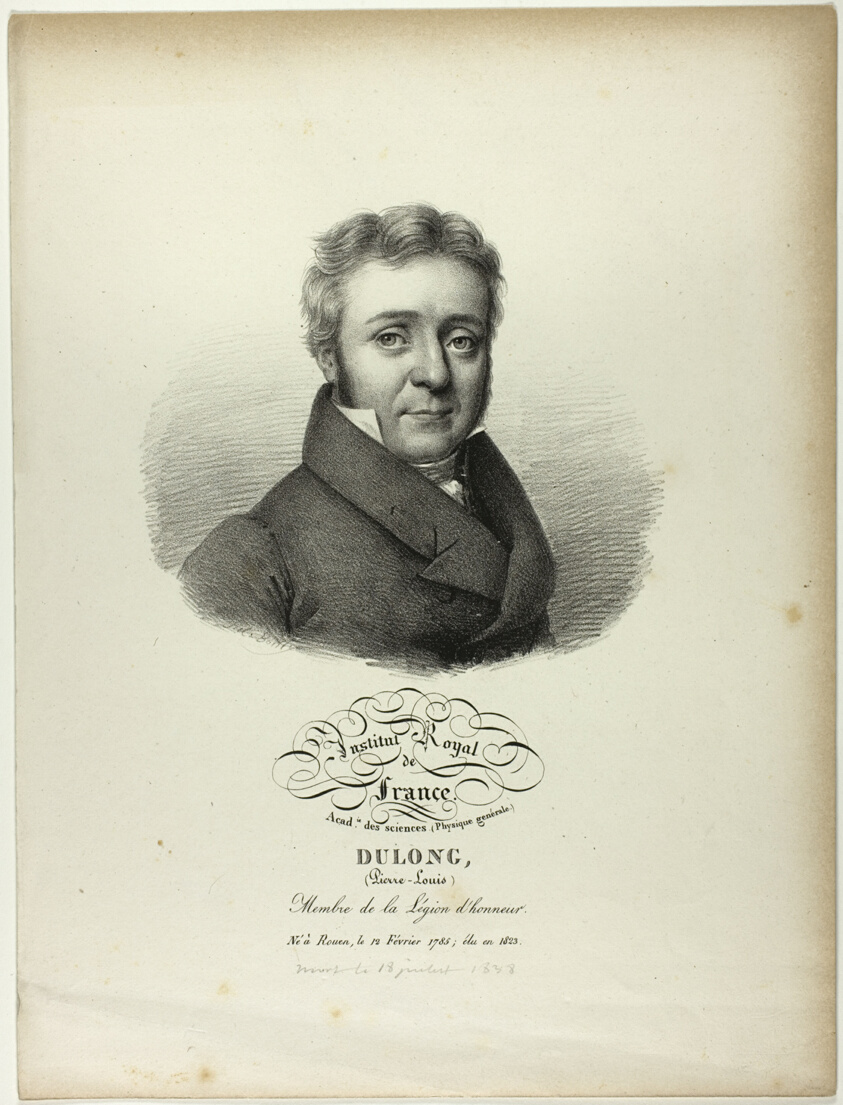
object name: Print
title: Portrait of Pierre-Louis Dulong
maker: Jules Boilly (French, 1786-1874)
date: c. 1825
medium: Lithograph in black on ivory wove paper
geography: France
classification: lithograph; print; prints and drawing